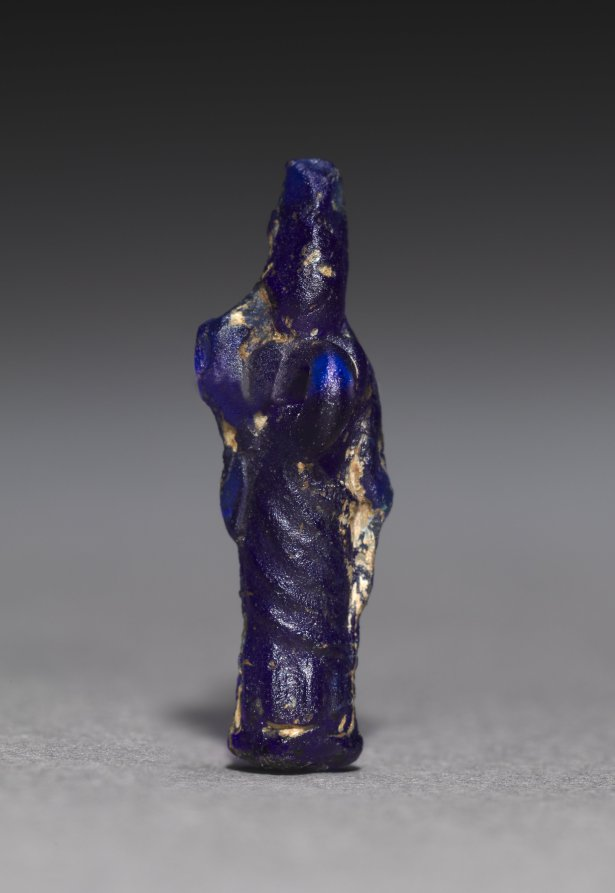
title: Amulet of Isis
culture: Egypt, Greco-Roman period (332 BCE–395 CE), Roman empire (30 BCE–395 CE)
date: 100 BCE–100 CE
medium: deep blue glass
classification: Amulets